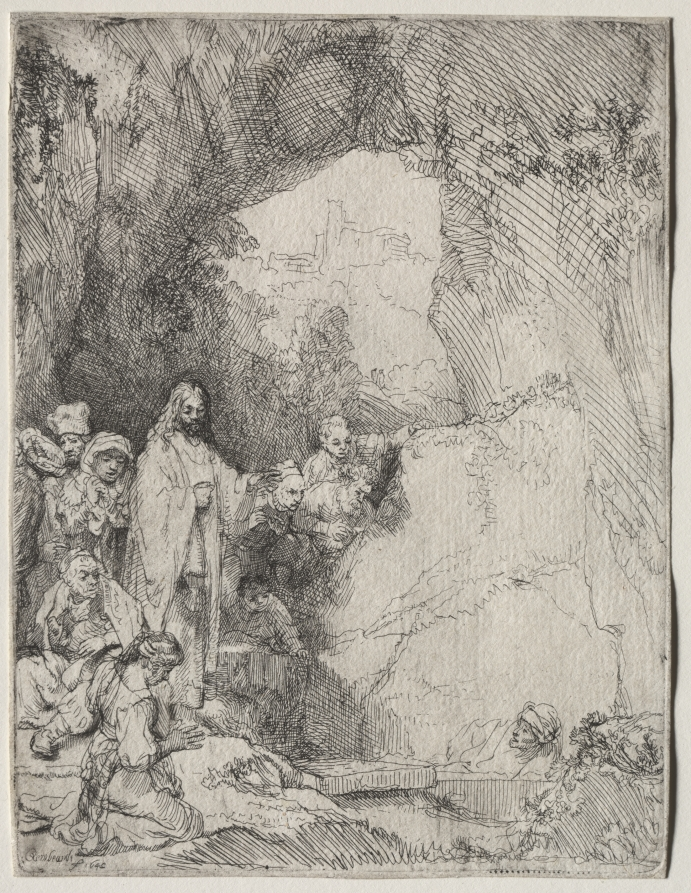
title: The Raising of Lazarus: Small Plate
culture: Netherlands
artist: Rembrandt van Rijn (Dutch, 1606–1669)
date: 1642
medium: etching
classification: Print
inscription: lower left, in plate: Rembrandt f. 1642 ; VERSO, upper center, in graphite: a ; center, in graphite: 10 ; lower left, in graphite: /220[a square over the first 2, in graphite, and a character of the second 2, in graphite] /220 ; lower center, in graphite: C. 37379 ; lower right, in graphite: 48[circled] ; lower right, in graphite: B 72